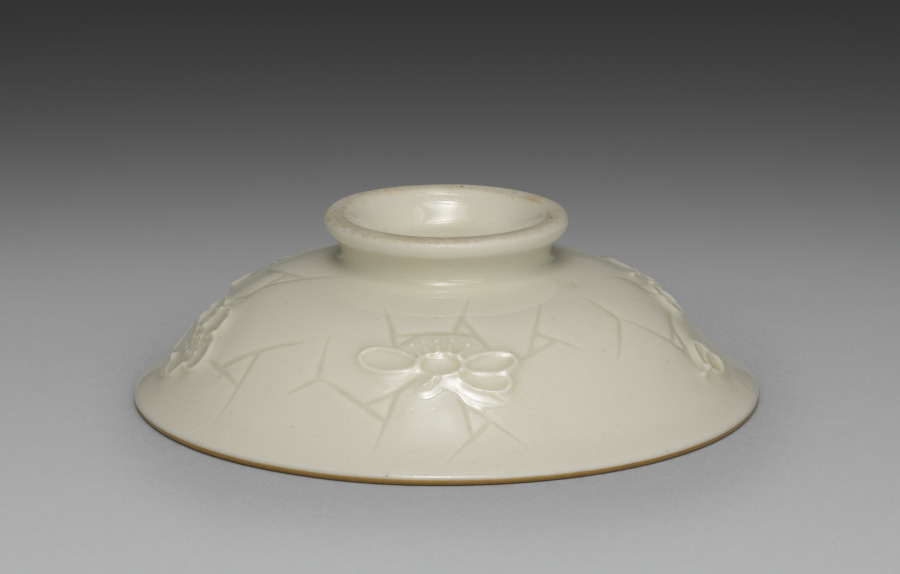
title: Cover for a Bowl from Dining Set with Plum Blossoms and Cracked-Ice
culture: Japan, Meiji period (1868–1912)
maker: Seifū Yohei II (Japanese, 1844–1878)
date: c. 1875–78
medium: Porcelain with molded designs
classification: Ceramic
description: Each item in this set has a delicate low-relief design of flowering plum branches over scattered, intersecting lines meant to resemble the cracked-ice surface of a frozen body of water and is signed on the base in gold pigment. While Yohei II produced many fine works in underglaze blue, like those produced by Kiyomizu Shichibei, he also made works in quite different styles later in his career, from the early 1870 s. In 1873, he was appointed purveyor to the Industrial Center of Kyoto Prefecture, a designation associated with Kyoto’s efforts to reach an international market through the port of Kobe; and from 1875 until his death, he was involved in national-level projects to present Japanese ceramics across the world. It was during this period that Yohei III was apprenticed to Yohei II, and it has been suggested that this set may in fact be an early example of Yohei III’s work, which he signed with his teacher’s name. Decorated with flowers resembling Japanese textile motifs, the set calls to mind the design of Yohei II’s pair of vases with plum blossoms in the Victoria and Albert Museum. Here, the elaborate trees created for a formal public exhibition setting have been translated into the approachable blossoms of the genteel domestic environment. While the designs are consistent across the pieces, each raised flower petal and pistil and each incised line in the ice was done by hand, so the cups, bowls, and dishes are similar yet unique. The bottoms of two boxes once identified the set’s owner, but the information has been deliberately obscured with black ink. However, inscriptions still visible appear to indicate two occasions, once at the end of July 1886 , and once again in June 1916 , when parts of the set were requested from Hokura in Niigata Prefecture. The location corresponds to a neighborhood in the present-day city of Jōetsu. The surname Tsuji 辻 also appears on a paper tag affixed to one of the box cloths. Future research may possibly reveal more about their provenance. A vase by Yohei III in a private collection combines the formal grandeur of the Yohei II vases in the Victoria and Albert Museum with the gentler design of this dining set, placing flowering plum trees against soft, scalloped-edge clouds resembling those in golden screens.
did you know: The dining wares have a creamy white coloration that the four boxes containing them identify as Korean in style.